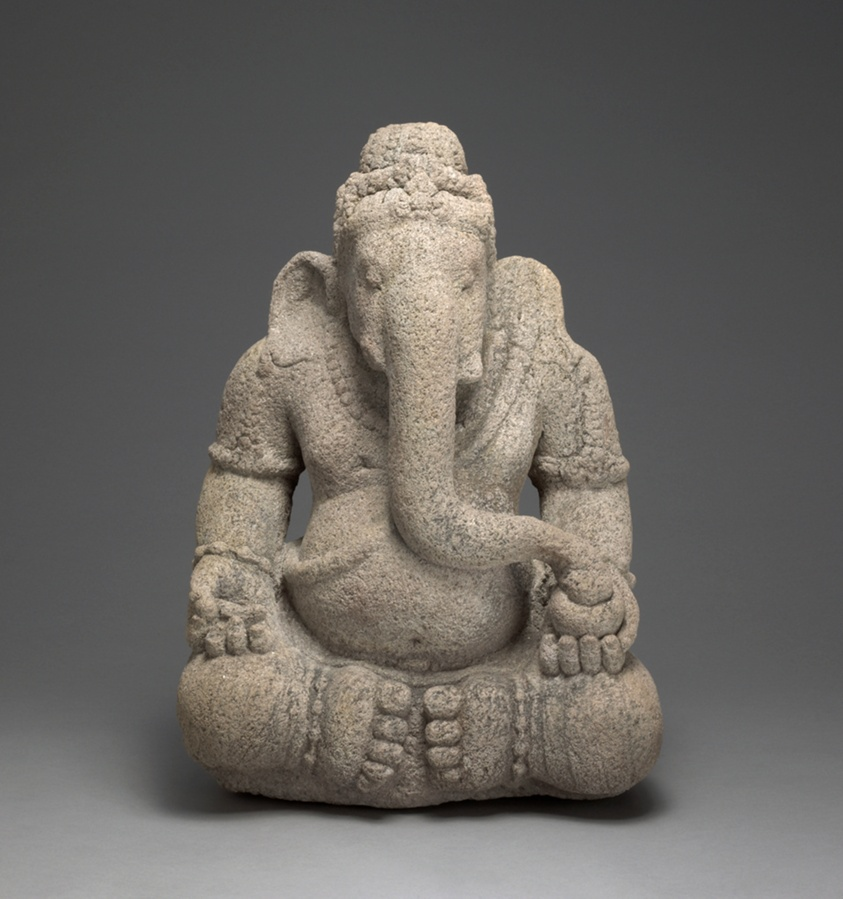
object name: Sculpture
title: God Ganesha, Remover of Obstacles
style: Southeast Asian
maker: Indonesia; Central Java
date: 9th/10th century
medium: Andesite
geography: Central Java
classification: stone (unidentified); stone; sculpture; asian art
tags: Ganesha, gods (deities), religion